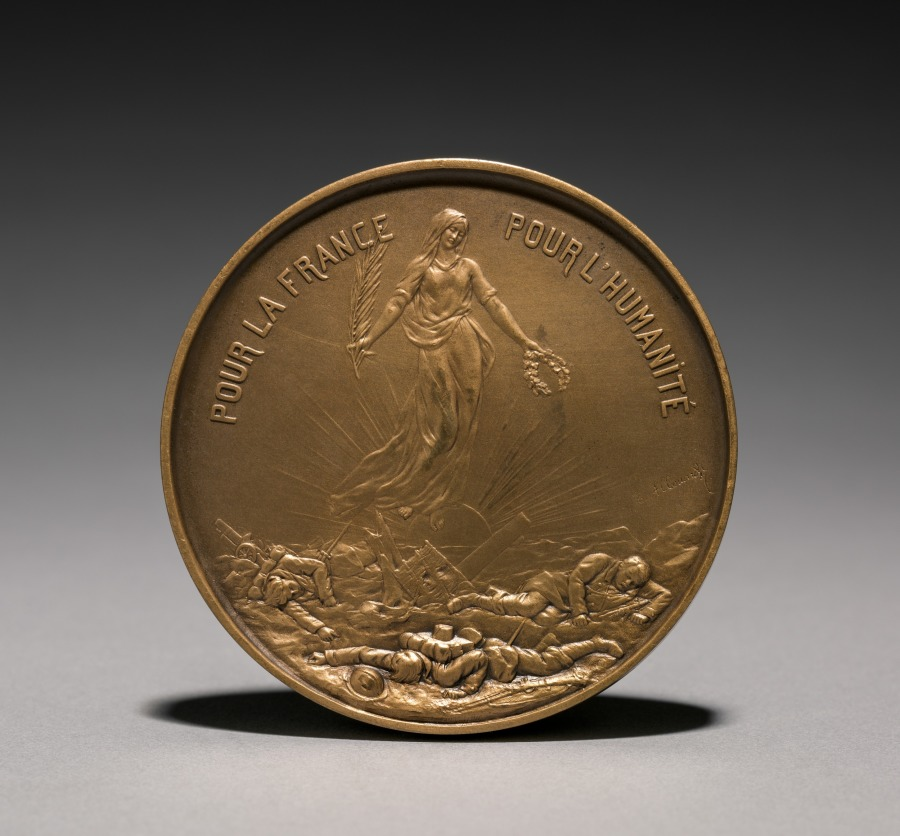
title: Medallion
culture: France, 19th-20th century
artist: Henri Emile Allouard (French, 1844–1929)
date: 1917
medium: bronze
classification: Metalwork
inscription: "Aux héros inconnus. À la memoire de . . . pro patria."